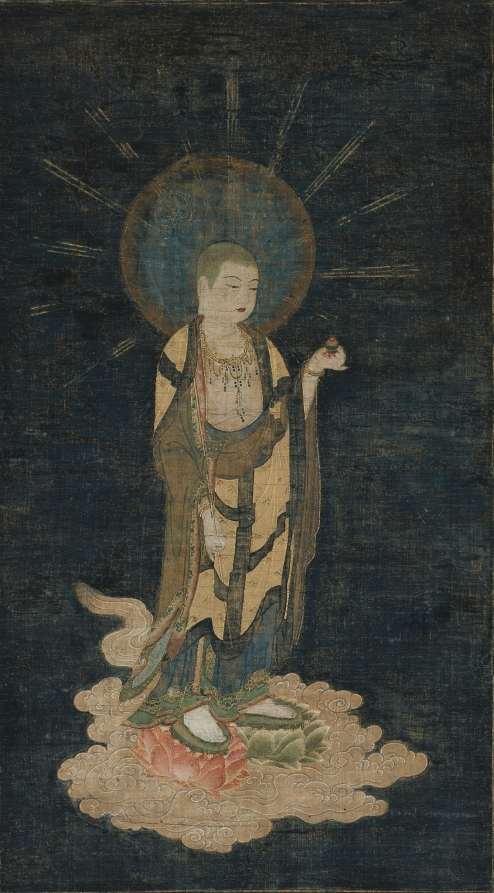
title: Welcoming Descent of Jizō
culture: Japan, Kamakura period (1185–1333)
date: 1200s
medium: Hanging scroll; ink, color, gold, and cut gold on silk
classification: Painting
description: The bodhisattva Jizō—an enlightened being who refuses to become a Buddha in order to aid other beings in their quest for enlightenment—appears as a Buddhist monk carrying a wish-fulfilling jewel and a golden staff topped with rings. He descends with each of his feet balanced atop a lotus, borne by clouds to save a suffering believer who has called out for his help. Jizō is well known among Buddhists for rescuing people from the many Buddhist hells.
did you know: Jizō is well known for rescuing people from the many Buddhist hells.